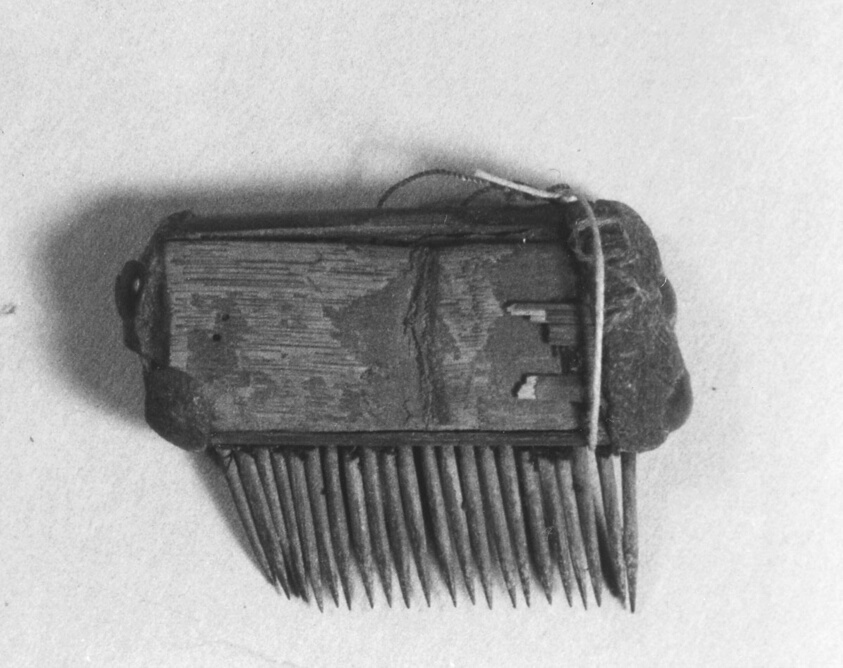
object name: Textile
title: Weaving Comb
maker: Peru, possibly central or south coast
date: A.D. 1000/1476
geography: Peru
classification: textile; textile working equipment; weaving; accessories (object genre)